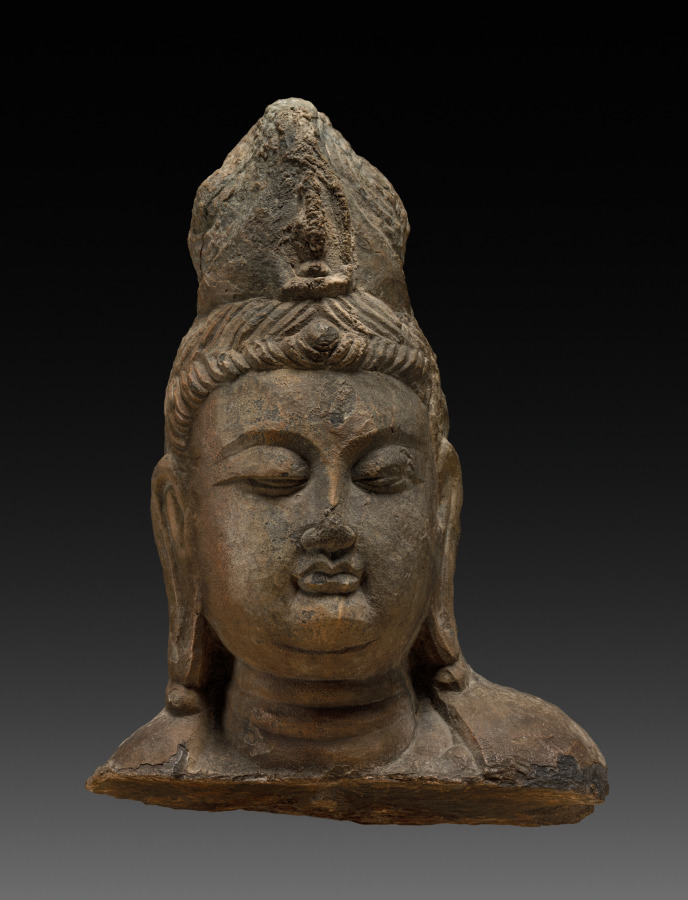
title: Head of Bodhisattva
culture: China, from Lung-mên, Tang dynasty (618-907)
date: 618–907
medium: dark gray limestone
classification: Sculpture